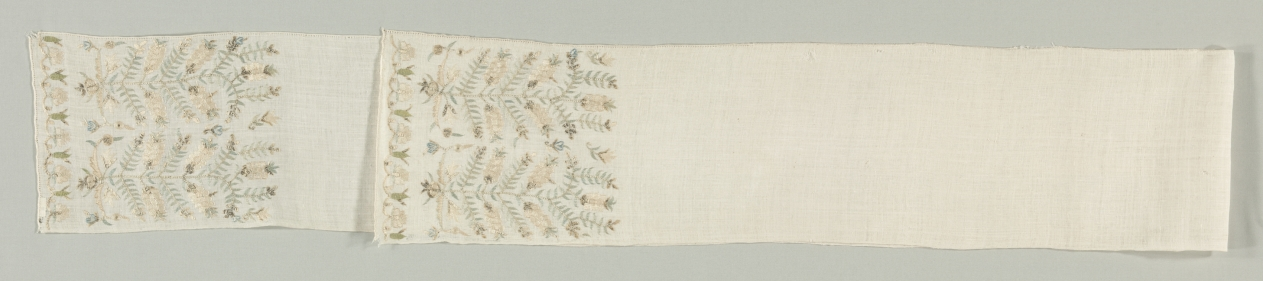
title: Embroidered Sash (Uckur)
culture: Turkey, 18th century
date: 18th century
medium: embroidery: silk and silver filé on linen tabby ground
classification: Embroidery